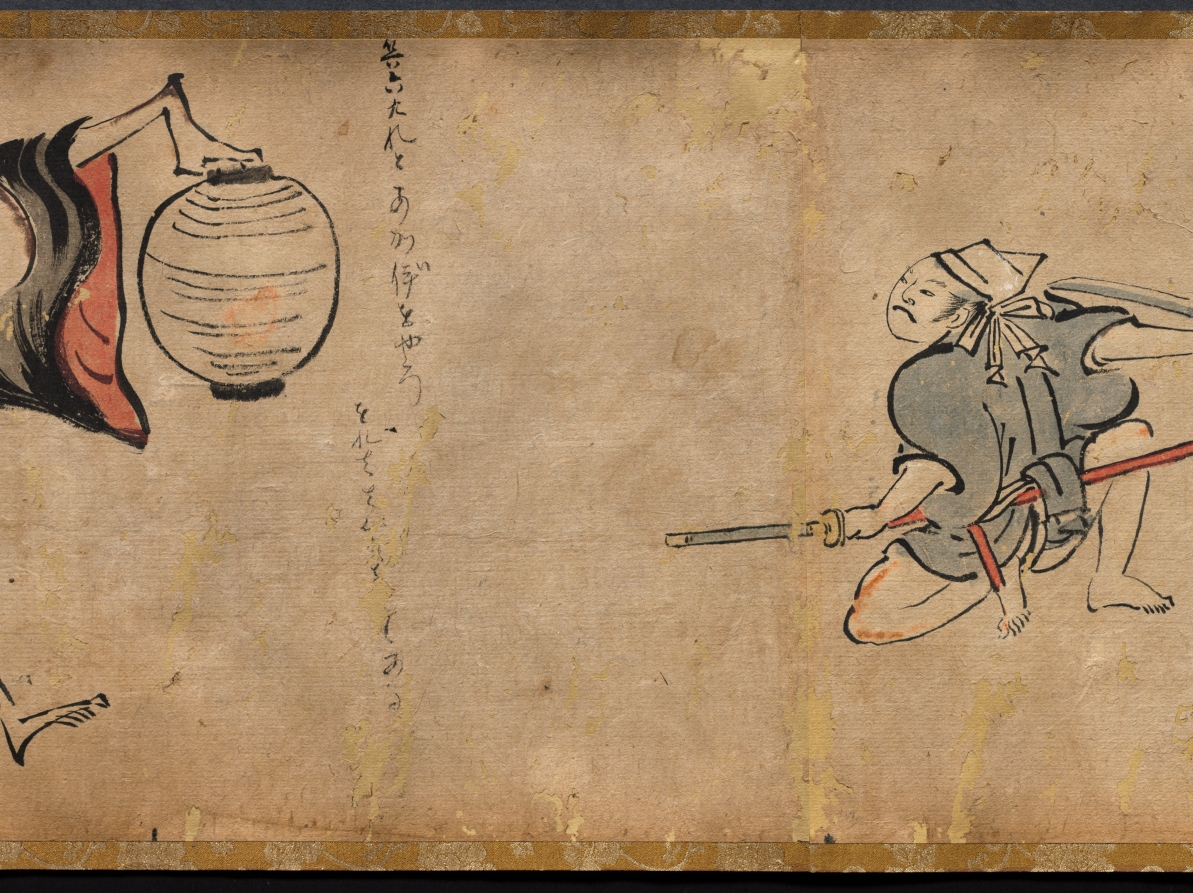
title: The Illustrated Tale of Oishi Hyōroku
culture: Japan, Edo period (1615–1868)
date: 1700s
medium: handscroll; ink and color on paper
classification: Painting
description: This incomplete handscroll illustrates part of the story of Oishi Hyoroku, a young man tasked with battling fox apparitions who were creating problems in his town. In other extant versions of the scroll, the story is set in the fall of 1624 in Kagoshima in southern Japan. Throughout the story, Hyoroku is tricked and terrified by the foxes that shift their shapes into a variety of monstrous phantoms. After repeated humiliations, he eventually captures two of the foxes. In this version, colloquial texts that function like text blurbs in comics appear throughout the scroll, but the main text is missing.